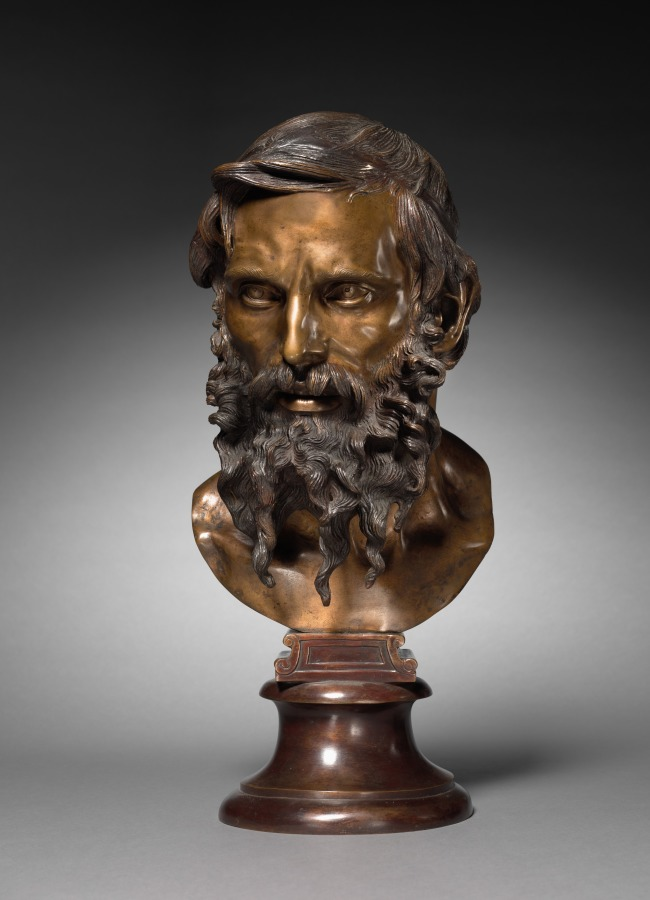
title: Head of a Philosopher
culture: Italy, 19th century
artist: Vincenzo Gemito (Italian, 1852–1929)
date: 1883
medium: bronze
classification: Sculpture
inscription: Signed: "Gemito"; stamped: "FONDERIA GEMITO NAPOLI"